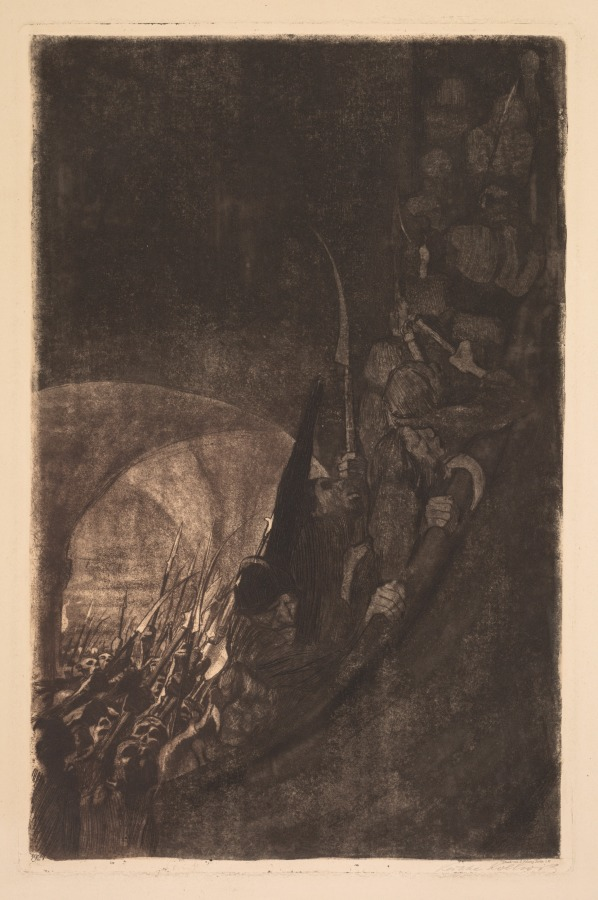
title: Peasants' War: Arming in a Vault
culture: Germany, 20th century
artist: Käthe Kollwitz (German, 1867–1945)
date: 1906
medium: etching and aquatint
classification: Print